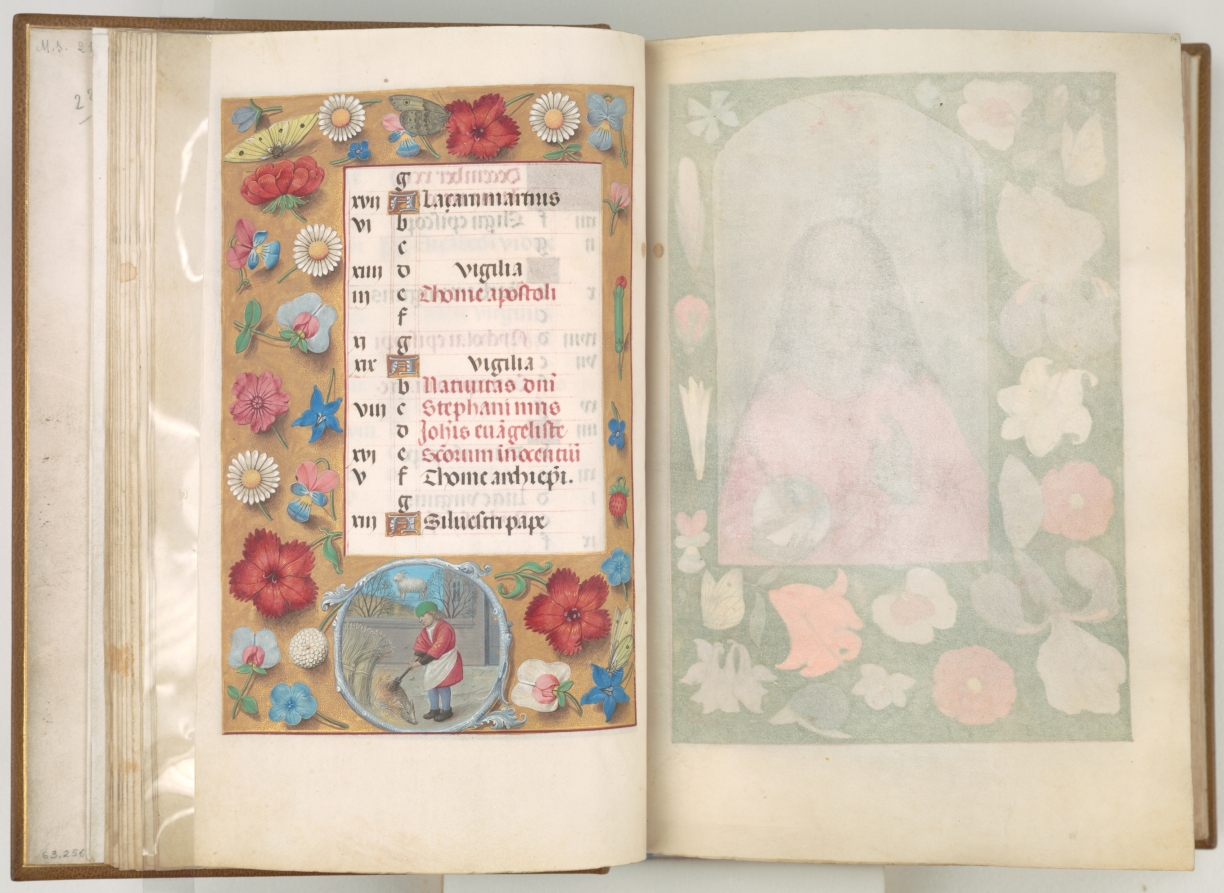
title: Hours of Queen Isabella the Catholic, Queen of Spain: Fol. 13v, December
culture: Flanders, Ghent and Bruges, late 15th century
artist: Master of the First Prayerbook of Maximillian (Flemish, c. 1444–1519)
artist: and Associates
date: c. 1500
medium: ink, tempera, and gold on vellum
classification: Bound Volume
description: This manuscript was illuminated by a circle of at least five highly organized manuscript painters active in the Flemish cities of Ghent and Bruges. The principal illuminator was Alexander Bening, who painted the majority of the book's miniatures. Manuscripts produced by this circle of artists are renowned for the decoration of their borders, which typically feature a rich variety of realistically-painted flowers, birds, and butterflies. This prayer book, called a book of hours, was intended not for a cleric, but for the private devotions of a lay person-in this case, Isabella the Catholic, Queen of Spain (1451-1504). Isabella's coat of arms embellishes the book's frontispiece. It is unlikely that the book was commissioned by the Queen herself; rather, she probably received it as a diplomatic gift from someone courting her patronage, perhaps Cardinal Francisco Jimenez de Cisneros. A Franciscan friar, Jimenez was dependent upon Isabella for his advancement, first to the post of Queen's confessor in 1492, and then to Archbishop of Toledo in 1495.